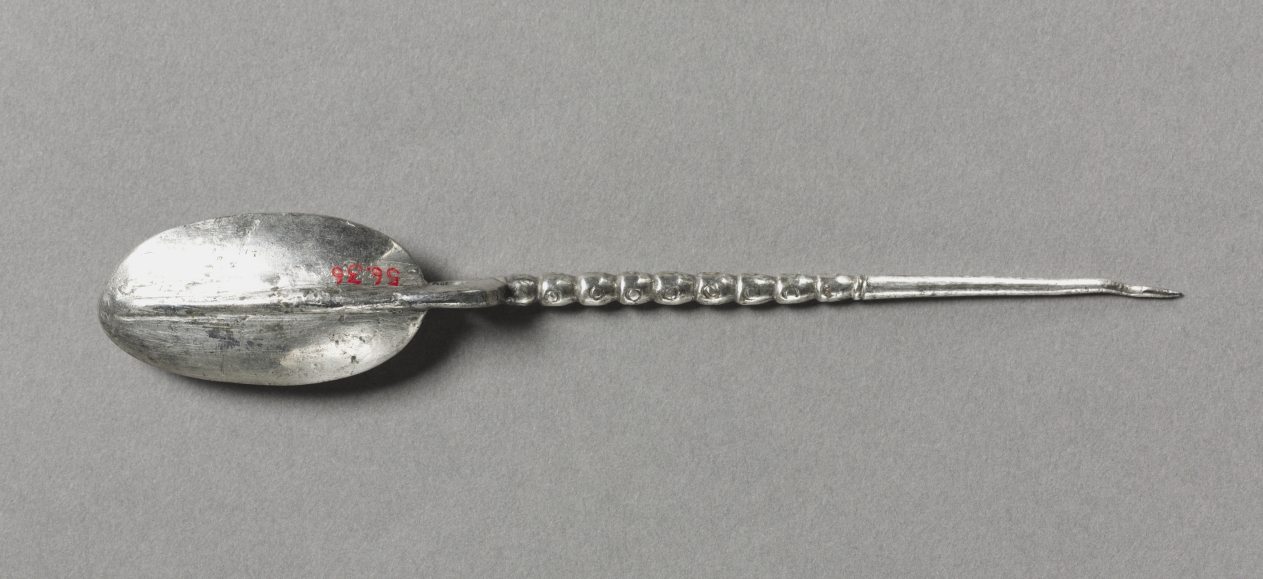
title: Spoon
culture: Byzantium, Syria(?), Byzantine period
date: 300s CE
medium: silver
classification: Metalwork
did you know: The handle of this spoon is delicately detailed with beaded ornament while its handle twists, ending in a sharp point. Timeless in design, this spoon would not seem out of place in a modern table setting.